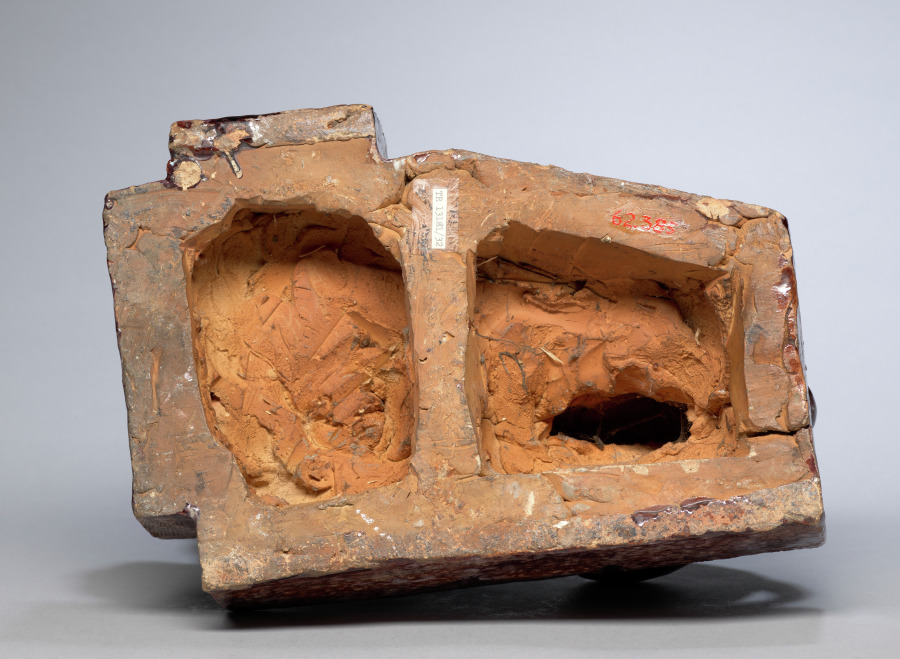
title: Lion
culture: France, 20th century (?)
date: 1900s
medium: terracotta glazed in mottled purple tin glaze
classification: Ceramic